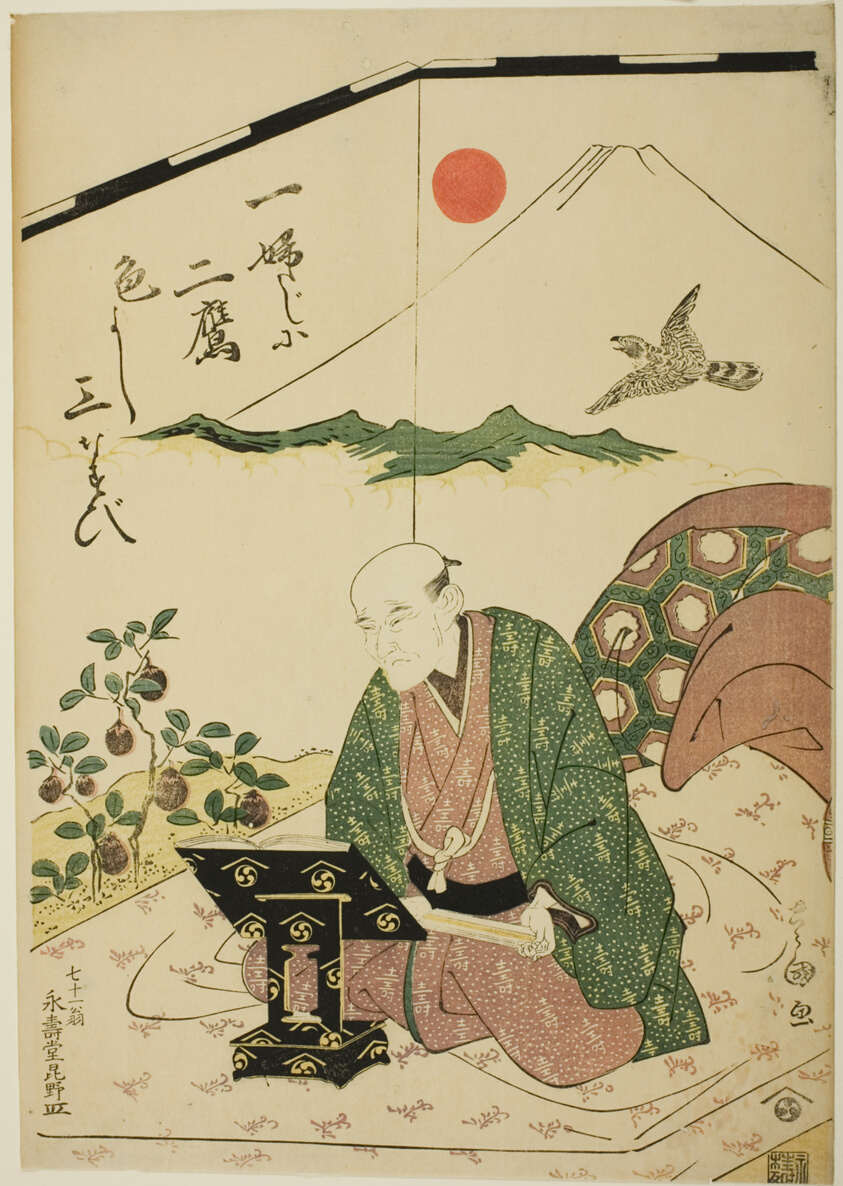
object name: Print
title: Portrait of Eijudo at Seventy-One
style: Japanese (culture or style)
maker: Utagawa Toyokuni I 初代 歌川 豊国; Japanese, 1769–1825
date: 1798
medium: Color woodblock print; oban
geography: Japan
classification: woodblock print; print; asian art